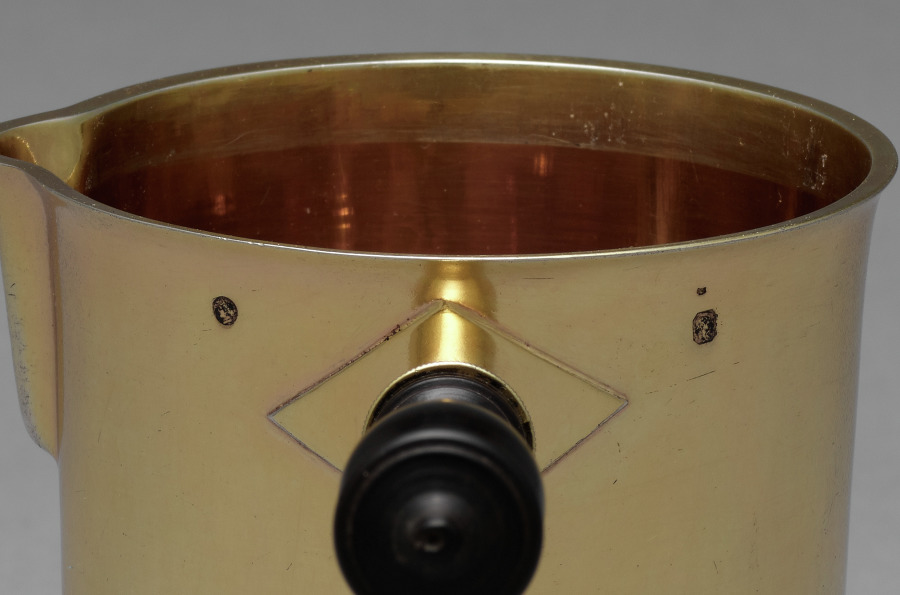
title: Chocolate Pot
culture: France, 19th century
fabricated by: Sixte-Simon Rion (French)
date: c. 1830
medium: silver, wooden handle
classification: Silver